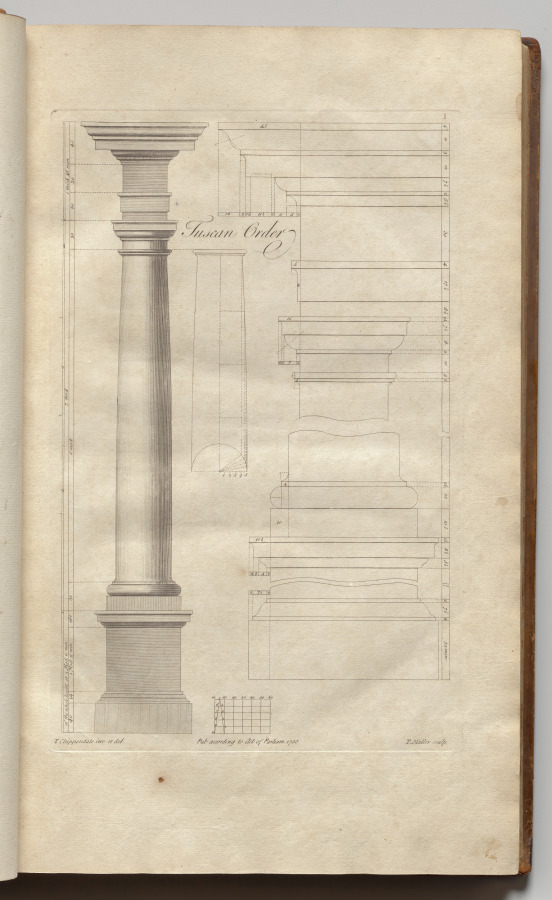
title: The Gentleman and Cabinet-Maker's Director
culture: Britain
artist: Thomas Chippendale (British, 1718–1779)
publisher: T. Becket & P. A. de Hondt (British)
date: 1762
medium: Paper, leather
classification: Bound Volume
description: Through his designs for furniture and architectural elements, Thomas Chippendale became one of the most influential tastemakers of the 1700s. He published three editions of The Gentleman and Cabinet-Maker’s Director (1754, 1755, and 1762), which sold widely in Britain, Ireland, and America. This rare French version of the third edition demonstrates his effort to spread his designs for both naturalistic and neoclassical decoration even wider across Europe.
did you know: Fewer than fifteen copies, including this one, of the French edition of Thomas Chippendale’s famous book of designs, are known to exist.